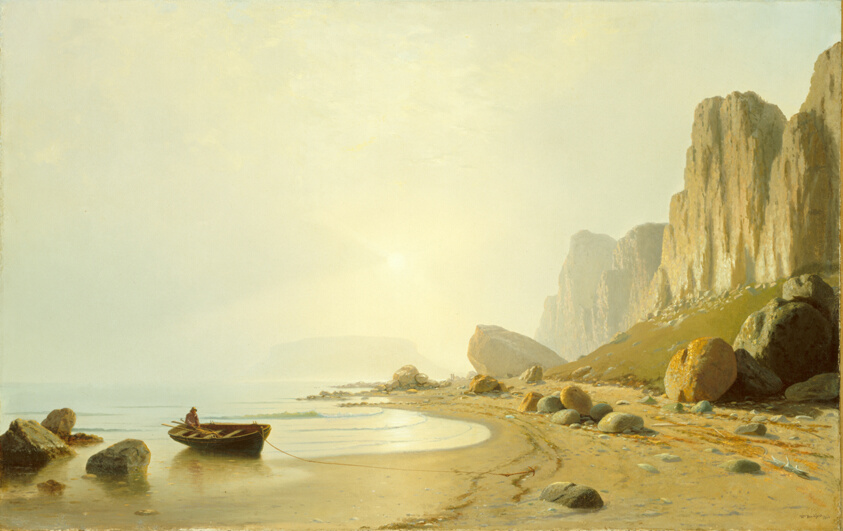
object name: Painting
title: The Coast of Labrador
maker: William Bradford (American, 1823–1892)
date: 1866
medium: Oil on canvas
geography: United States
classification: painting; american arts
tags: landscapes